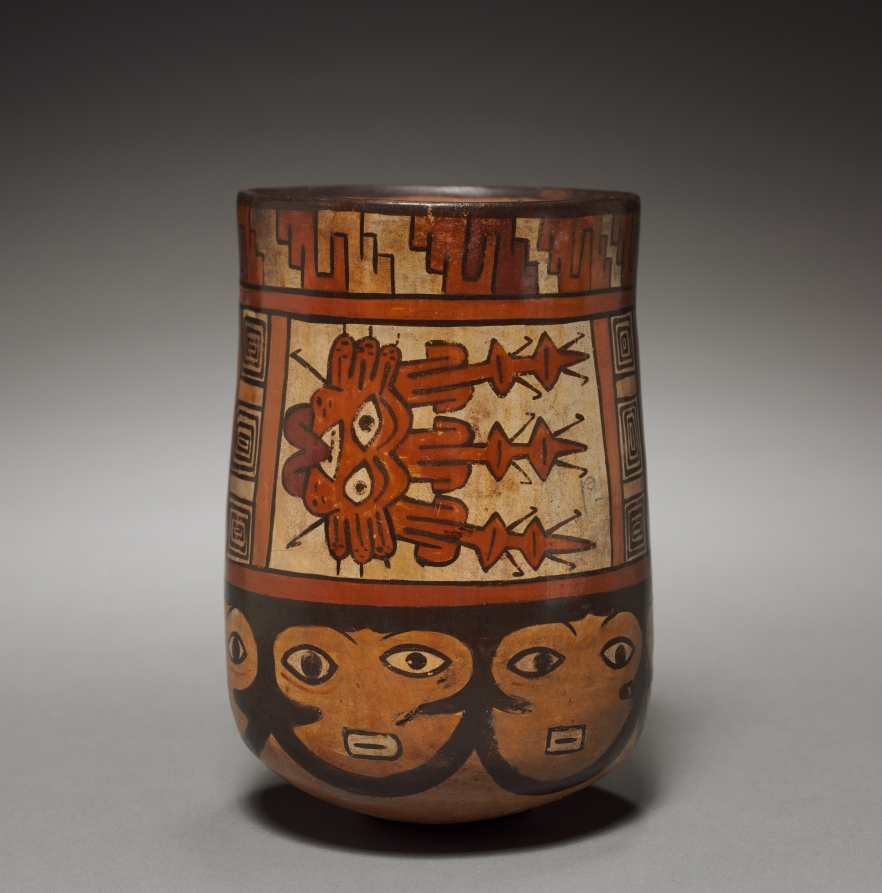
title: Vessel with Female Faces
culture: Peru, South Coast, Nasca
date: 100 BCE–700 CE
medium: earthenware with colored slips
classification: Ceramic